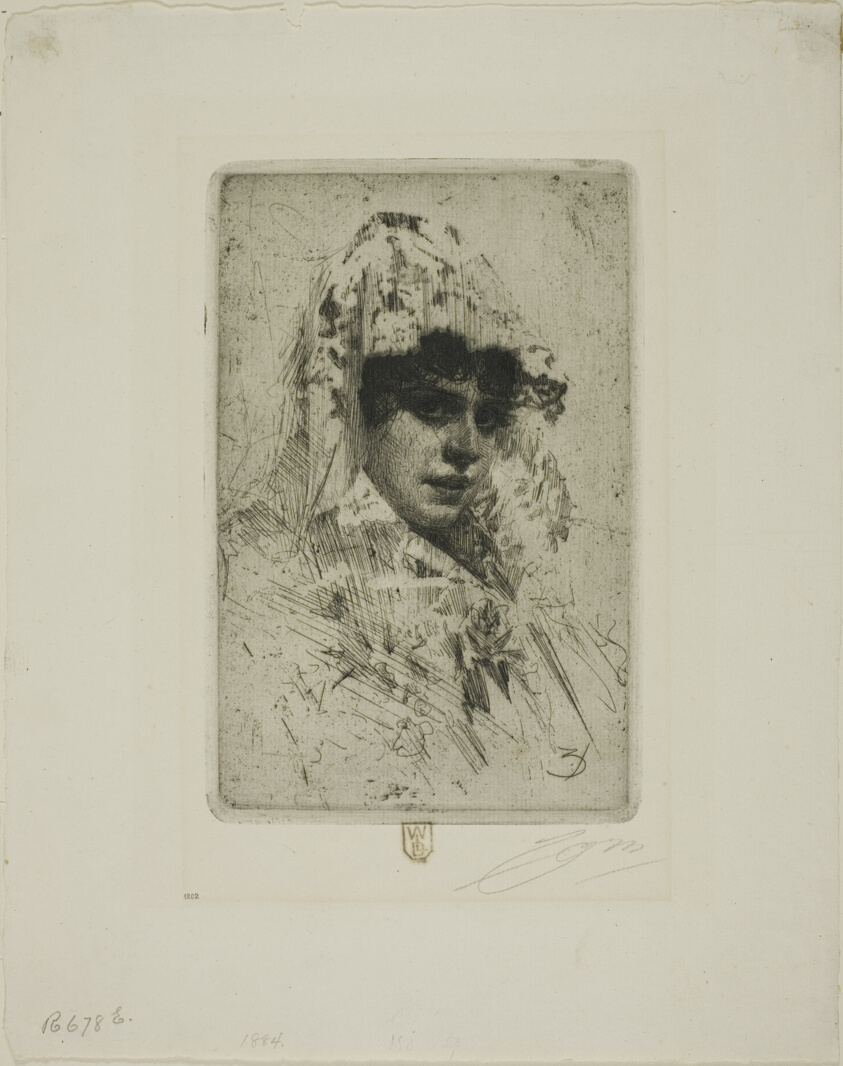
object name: Print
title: Spanish Woman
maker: Anders Zorn (Swedish, 1860-1920)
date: 1884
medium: Etching on off-white laid paper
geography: Sweden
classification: etching; print; prints and drawing